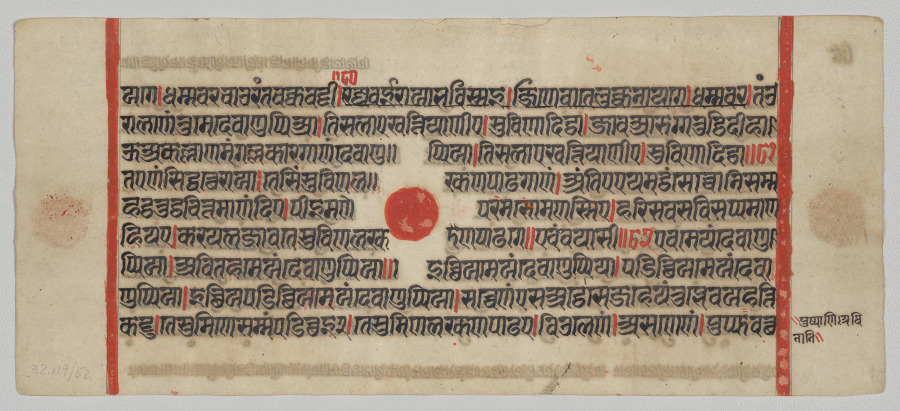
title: Text, Folio 27 (recto), from a Kalpa-sutra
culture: Western India, Gujarat, last quarter of the 15th century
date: c. 1475–1500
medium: Gum tempera, ink, and gold on paper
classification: Painting